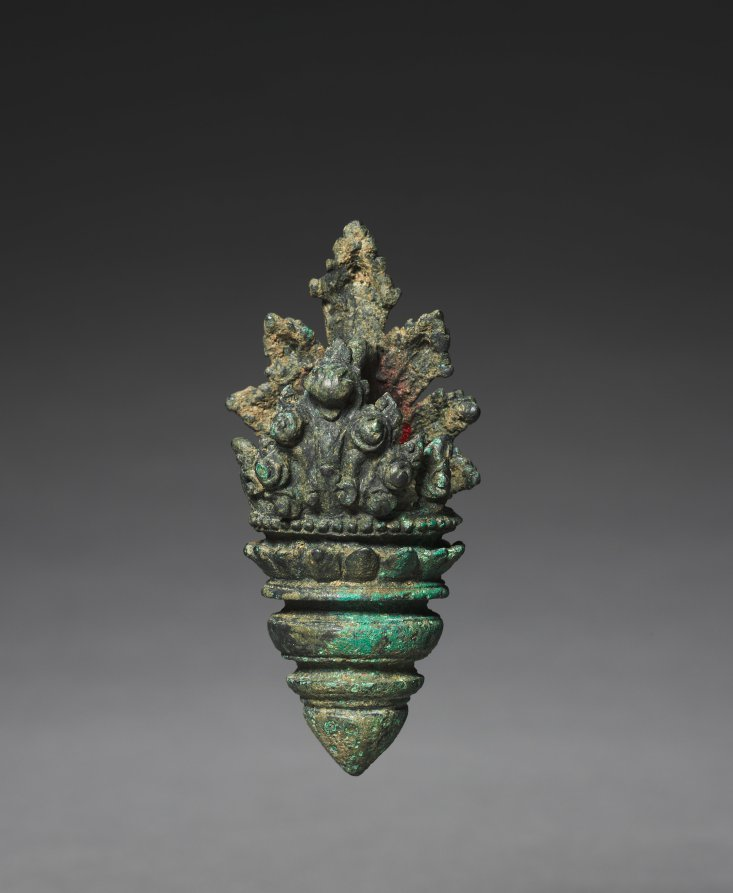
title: Earring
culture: Cambodia, Angkorean Period (877-1431)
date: c. 1100s–1200s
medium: bronze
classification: Jewelry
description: Earrings that were cast in bronze and then gilded (on this example, the gilding has worn off) were attached to the stone sculptures themselves. The serpent, a Khmer national emblem, was used frequently as an ornamental motif. The historical Buddha Shakyamuni was born a prince in northern India in the late 500s BC, and he wore heavy earrings that dragged down his earlobes. When he renounced worldly life to seek enlightenment, he cast off all his jewels. Generally, Buddha images have elongated earlobes without earrings, while bodhisattvas—beings close to full enlightenment—wear princely jewels in reference to Shakyamuni’s princely life just before he became a Buddha. By the early 1200s in Cambodia, however, these categories had become more nuanced: the bodhisattva Lokeshvara was viewed as such a potent figure he was sometimes called a Buddha and images of some special Buddhas other than Shakyamuni were distinguished by their jewelry.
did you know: This earring is topped with the form of a naga, a water serpent with a multi-headed hood.